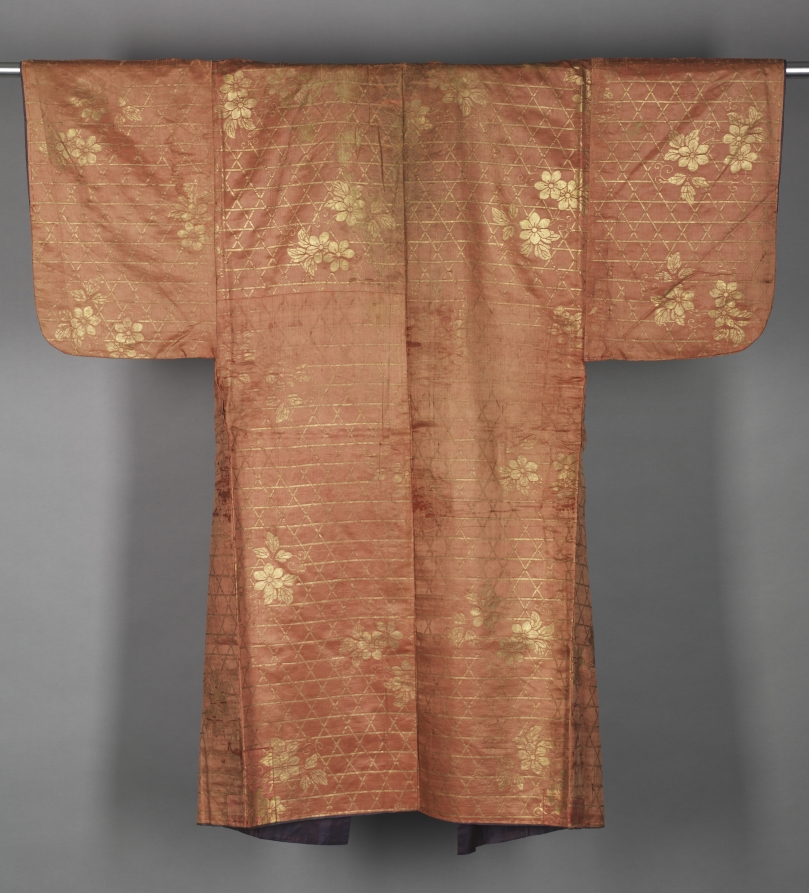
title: Noh Costume (Surihaku) with Flowers in Fence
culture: Japan, Edo period (1615–1868)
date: 1800–1850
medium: silk, metal thread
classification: Garment